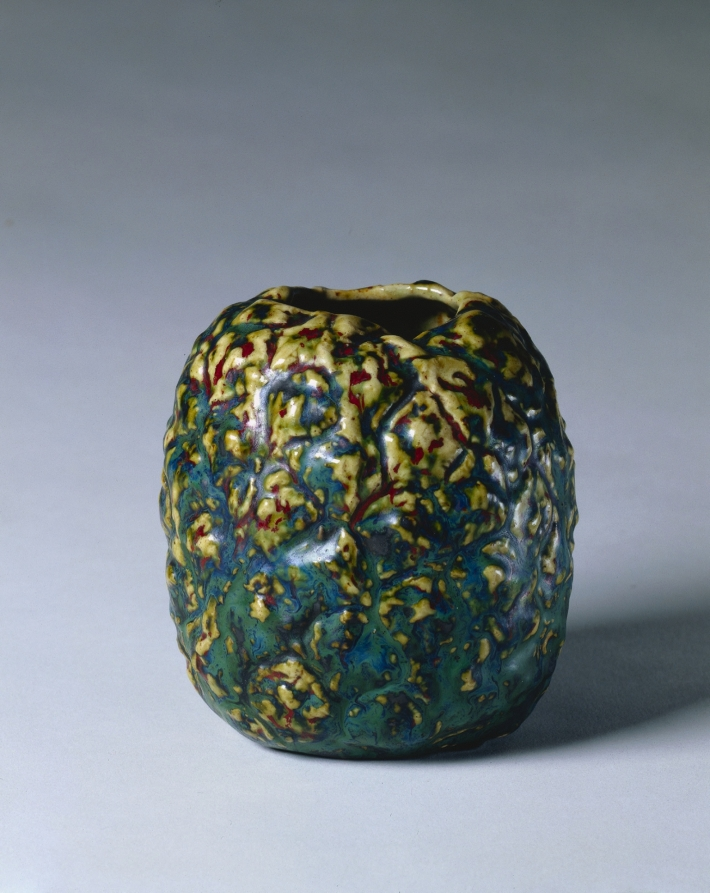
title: Vase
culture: France, early 20th Century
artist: Pierre Adrien Dalpayrat (French, 1844–1910)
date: c. 1900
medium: stoneware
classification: Ceramic